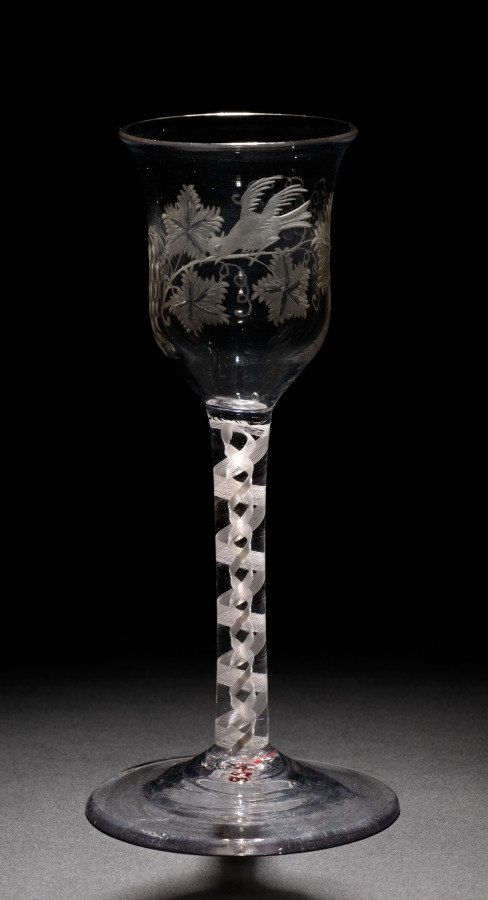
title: Wine Glass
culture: England, 18th century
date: 1750–1799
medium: glass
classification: Glass